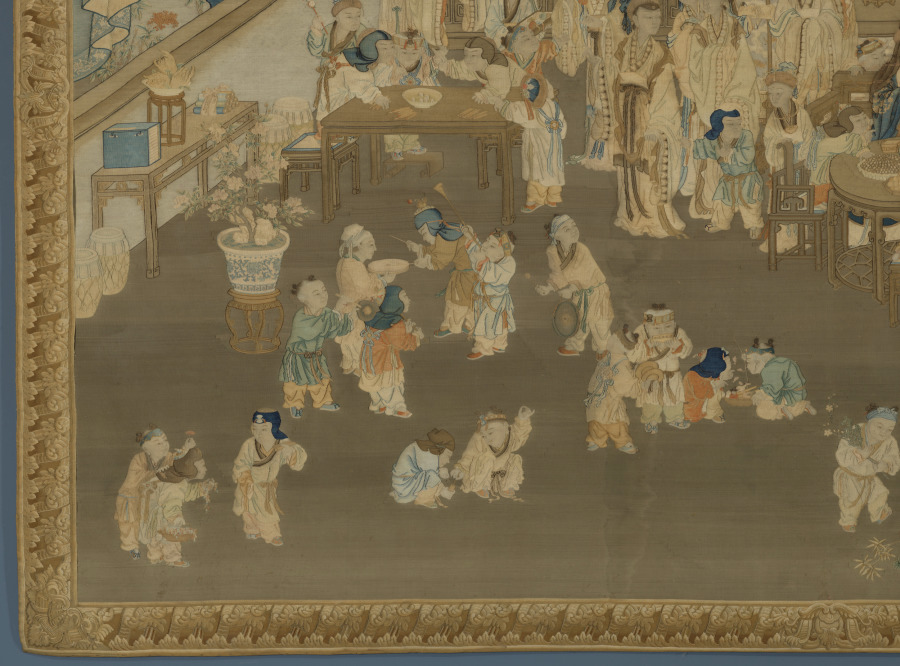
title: Family Gathering on New Year's Morning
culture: China, Qing dynasty (1644-1911)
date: late 1760s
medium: Silk and wool: tapestry weave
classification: Tapestry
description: This European-style tapestry depicts a family gathering, in a woven Western picture frame, that presumably once furnished the Hall of Cultivating the Mind (Yangxin dian) in the Forbidden City. The tapestry employs Western perspective and shading combined with the traditional Chinese subject of a family gathering in a palace, including motifs expressing wishes for good fortune and for a peaceful reign. In 1766, six French tapestries had been presented to the Chinese court. The Qianlong emperor was so intrigued that he commissioned tapestries in the French style from Suzhou. Records mention an imperial order for tapestries in the Western style, such as this one, in 1769, 1770, and 1775.